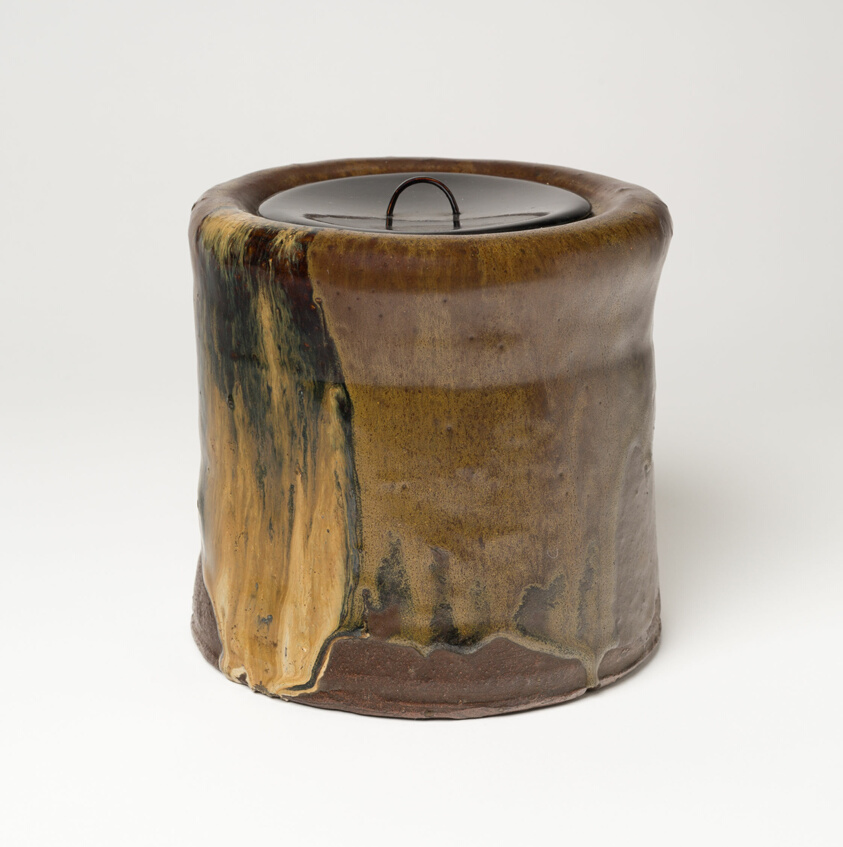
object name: Vessel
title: Satsuma-Ware Water Jar (Mizusashi)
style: Japanese (culture or style)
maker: Japanese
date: 18th century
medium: Glazed stoneware with lacquer lid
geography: Japan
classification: ceramics; asian art; vessel